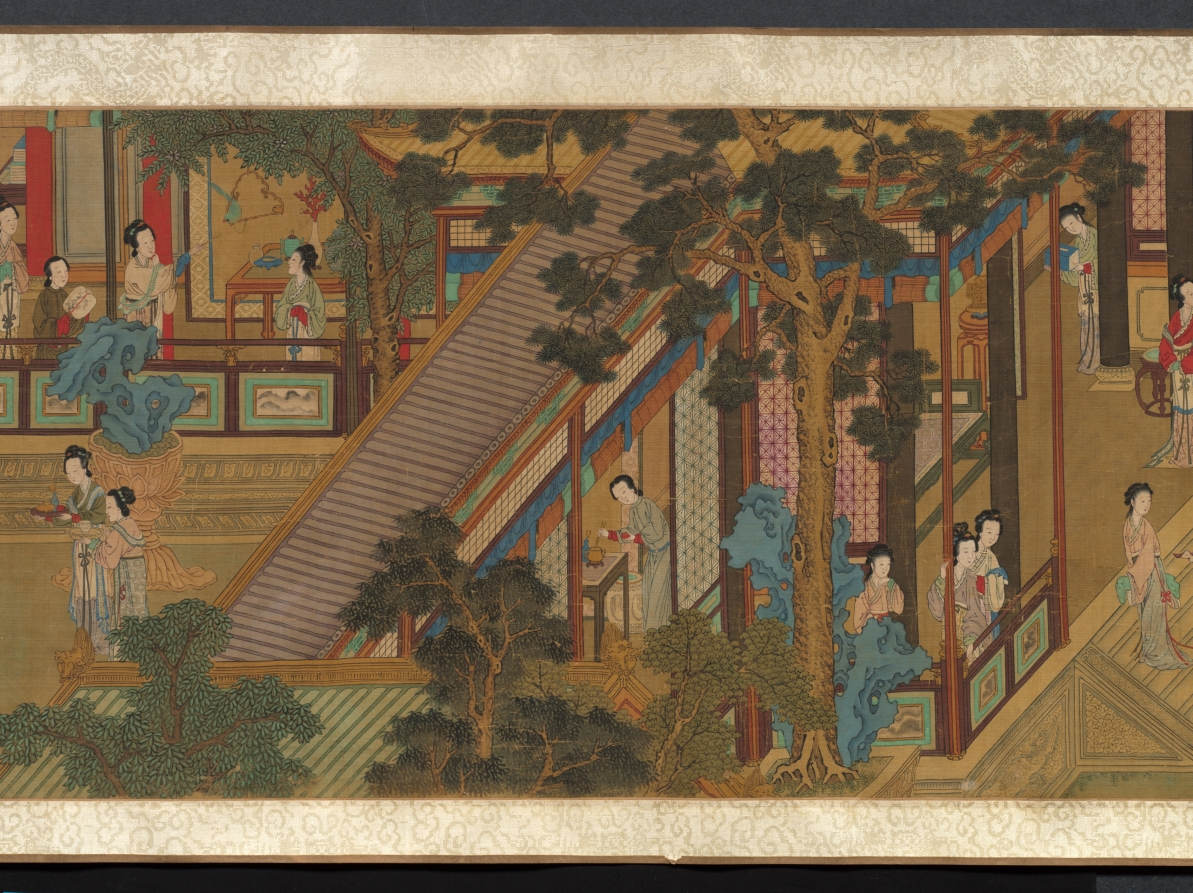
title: Palace Ladies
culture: China, Qing dynasty (1644-1911)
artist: copy after Qiu Ying (Chinese, 1494–1552)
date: 1644–1911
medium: handscroll, ink and color on silk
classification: Painting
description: This handscroll illustrates the pursuits of court ladies in a palace precinct on a spring day. Women, young girls, and their maids amuse themselves by sitting on a swing, playing games, watering and admiring peonies, performing music together, playing the qin (zither), feeding a parrot on the balustrade and fish in the water, or catching butterflies. The life of elite women was mostly restricted to the so-called inner quarters, meaning the garden and inner courts of the house. This painting idealizes the world of young palace girls that in fact was often filled with boredom and waiting for a lover.